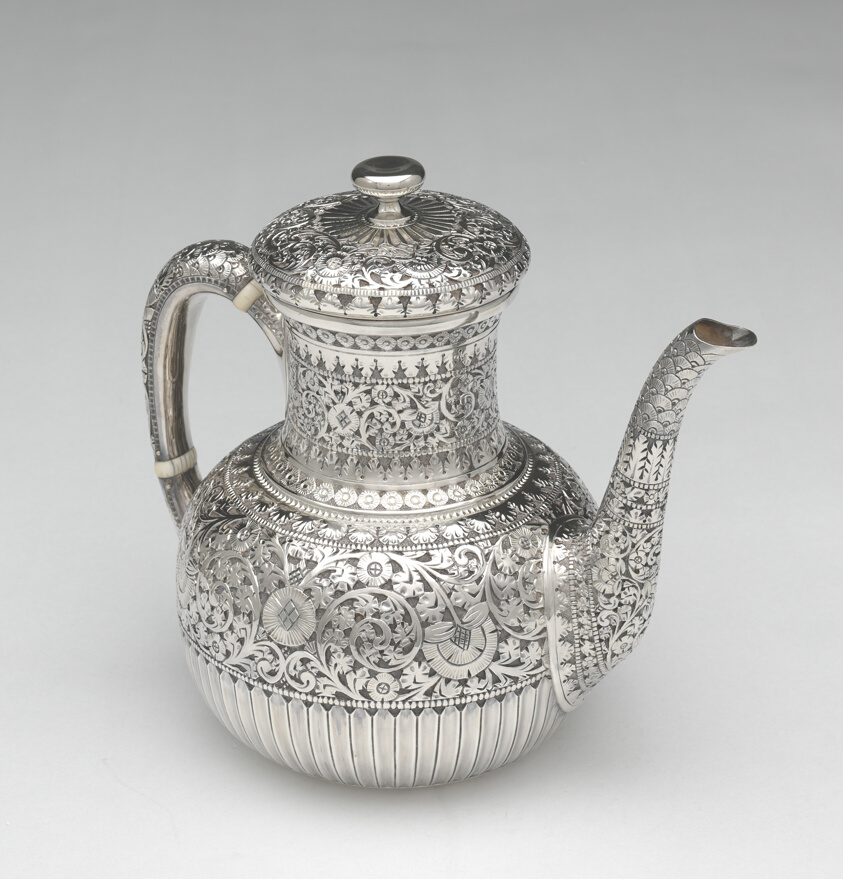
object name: Metalwork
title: Teapot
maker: Whiting Manufacturing Co.; American, 1866–1926; New York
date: 1875–90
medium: Silver and ivory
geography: New York City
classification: teapot; silver; american decorative arts; american arts; decorative arts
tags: dining, drinking